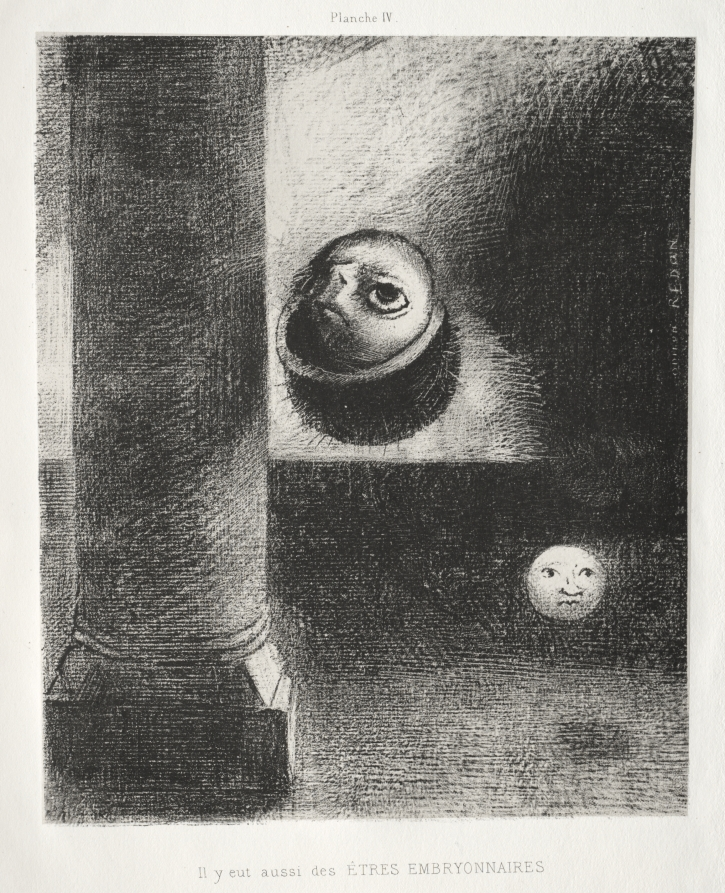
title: There Were Also Embryonic Beings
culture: France, 19th century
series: Homage to Goya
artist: Odilon Redon (French, 1840–1916)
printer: Lemercier & Cie.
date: 1885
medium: lithograph on China paper laid on wove paper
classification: Print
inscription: printed above image at center: Planche IV.; below image at center: Il y eut aussi des ÊTRES EMBRYONNAIRES.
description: This series is one of many that Odilon Redon created throughout his career. Nearly two-thirds of his lithographs took the form of portfolios—prints connected conceptually by a theme or narrative and physically by a folder or binding. Such works were often dispersed over time, but Cleveland was fortunate to acquire several complete sets with their original covers during the 1920s. Dating from Redon’s early experimentation with lithography, Homage to Goya was intended as a tribute to 18th-century Spanish master Francisco de Goya, whose interest in dreams and the subconscious influenced Redon. The six seemingly unrelated images celebrate Goya’s ambiguity and collectively suggest the introspection and isolation of artistic practice.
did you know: This portfolio was published in an edition of 50, one of which Redon sent to poet Stéphane Mallarmé soon after Redon became a frequent participant in a literary salon held regularly at Mallarmé's home.